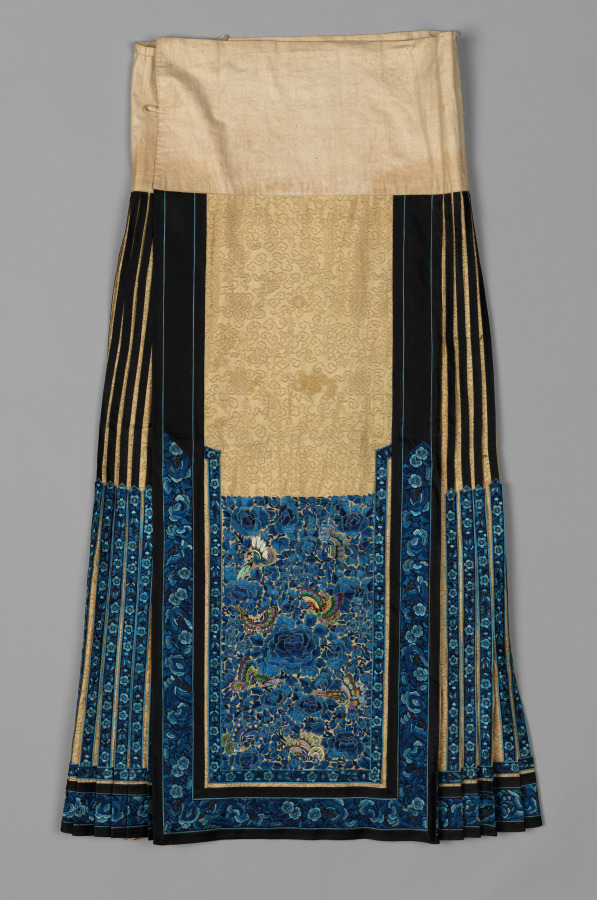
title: Skirt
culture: China, Qing dynasty (1644–1911)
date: late 1870s–early 1880s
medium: Silk, embroidery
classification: Garment